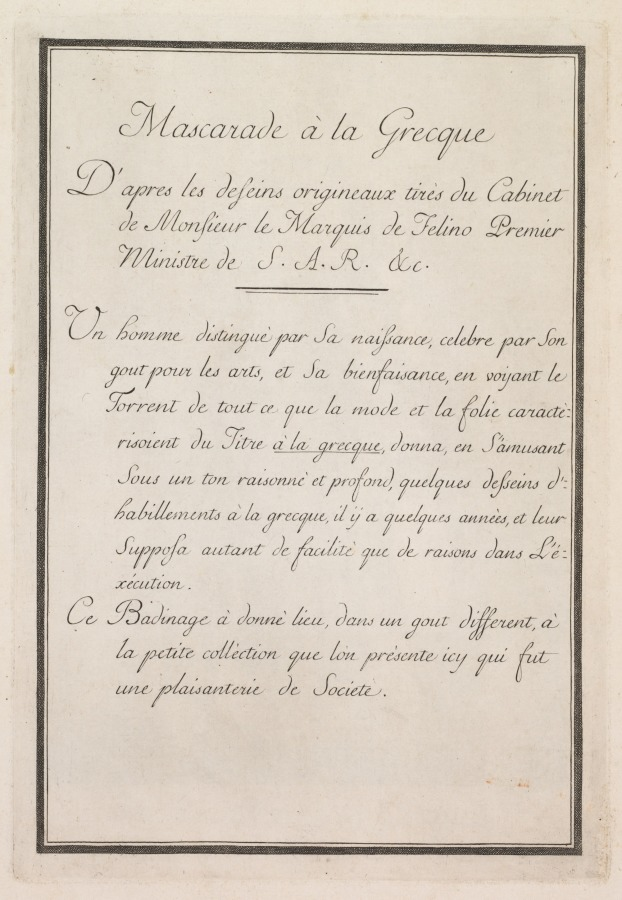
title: Mascarade à la Grecque: Title Page, Plate 1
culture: Italy, 18th century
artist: Benigno Bossi (Italian, 1727–1792)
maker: after Ennemond Alexandre Petitot (French, 1727-1801)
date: 1771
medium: etching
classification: Print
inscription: In plate: Dediee a Monsieur le Marquis de Felino Premier Ministre de S. A. R. par son très humble serviteur Benigno Bossi. Parme MDCCLXXI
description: Literature: Berlin II, no. 475 (Berlin Staatlich Museen, Katalog der Ornamentstich-Sammlung der Staatlichen Kunstbibliothek Berlin, Berlin and Leipzig, 1936-39); Cohen-de Ricci 178 (livre rare); Guilmard p. 225, no. 29 First edition before the addition of the "Milano" on the title page